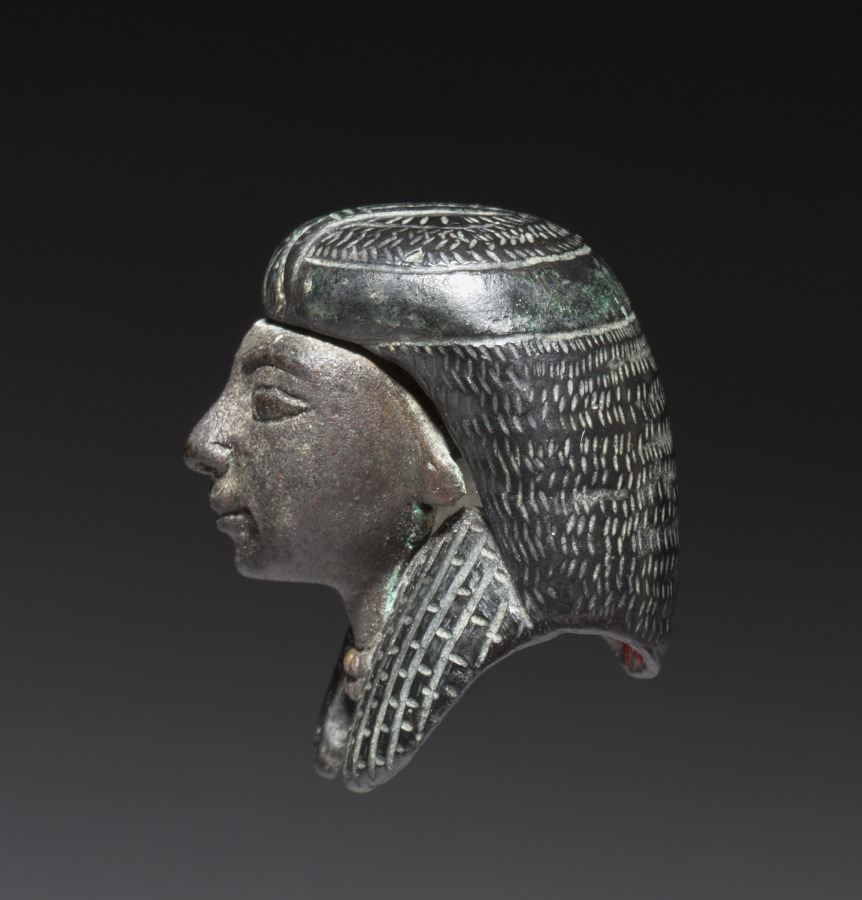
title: Bronze Mount from a "Shawabty Bundle": Head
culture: Egypt, Thebes, Wadi Qubbanet el-Qirud, New Kingdom (1540–1069 BCE), Dynasties 18–19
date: c. 1336–1256 BCE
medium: bronze, black copper wig, traces of gilding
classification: Funerary Equipment